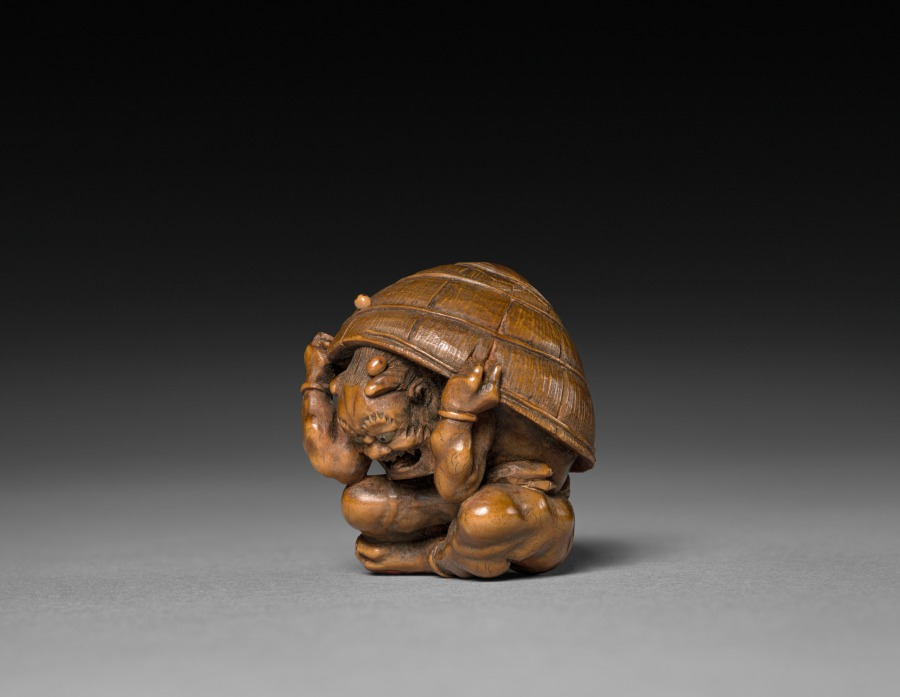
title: Demon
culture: Japan, Edo period (1615–1868)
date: 1615–1868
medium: wood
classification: Netsuke